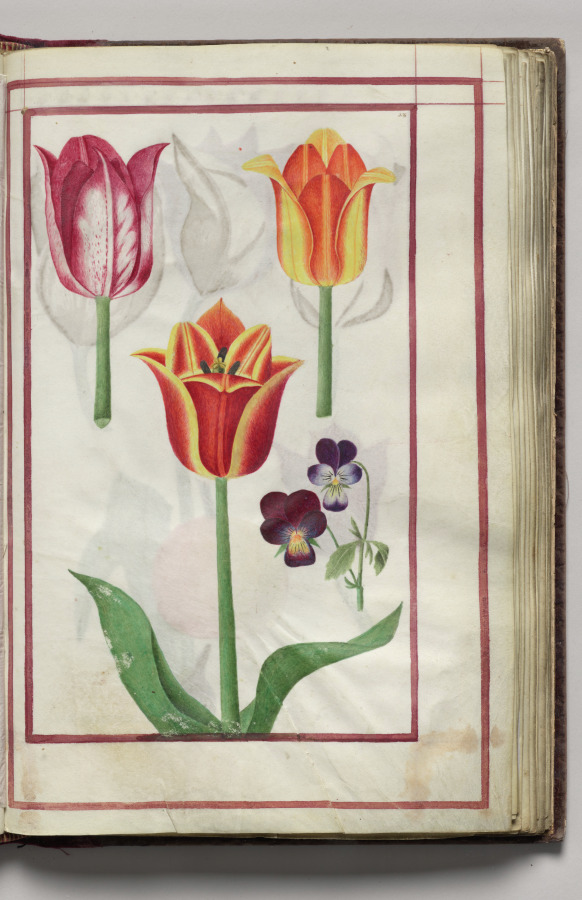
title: Tulips and Violets, folio 14 (recto), from Florilegium (A Book of Flower Studies)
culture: France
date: 1608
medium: watercolor, ink, silver, and gold over occasional traces of pencil, on vellum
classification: Bound Volume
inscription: Dated: Poitiers 1608 (on frontispiece) Signed: On frontispiece in black ink, lower right: Van Kuyk Notation on drawing: Frontispiece: in pencil, lower margin: * élève de Van Kessel, peintre flammand (* in pencil also appears in front of Van Kuyk's name).